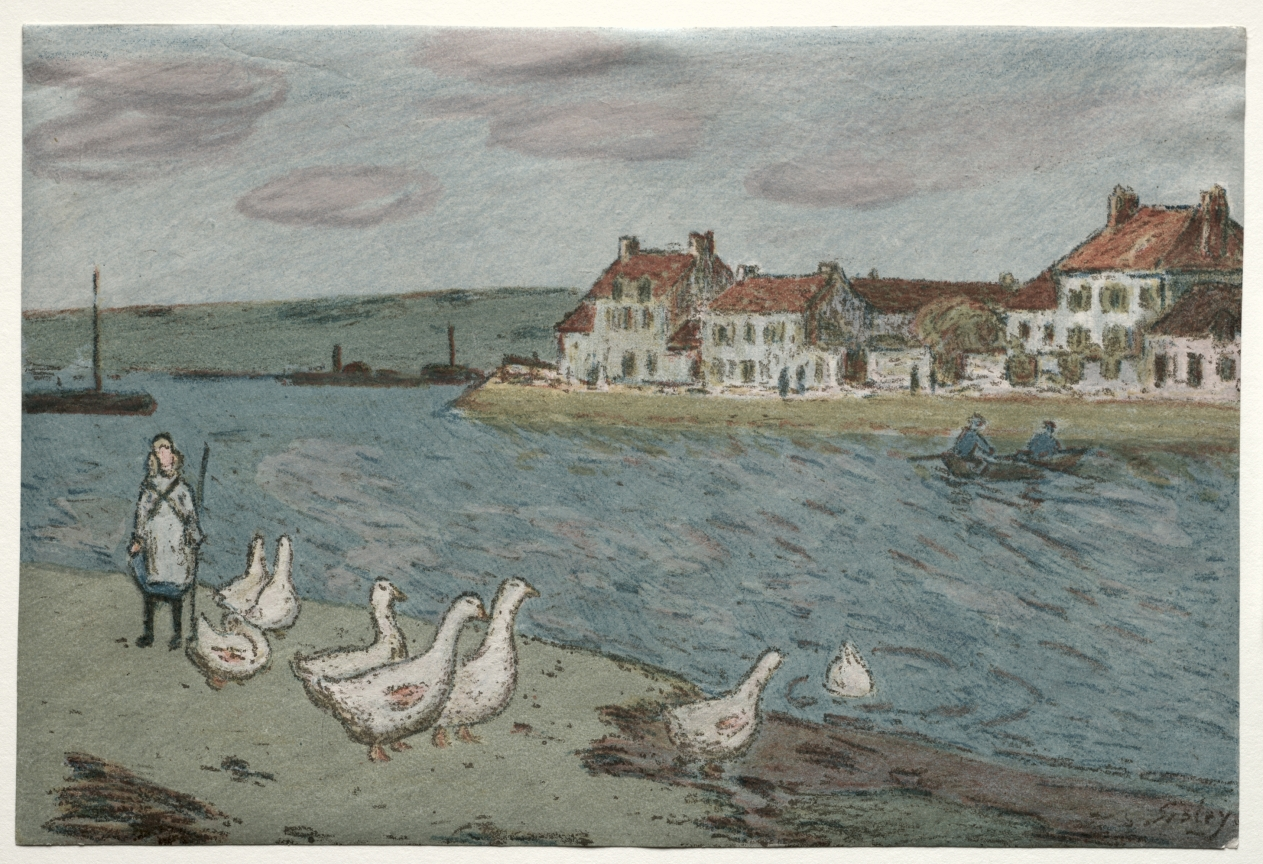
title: The River Bank or Geese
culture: France, 19th century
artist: Alfred Sisley (French, 1840–1899)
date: 1897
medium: lithograph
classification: Print